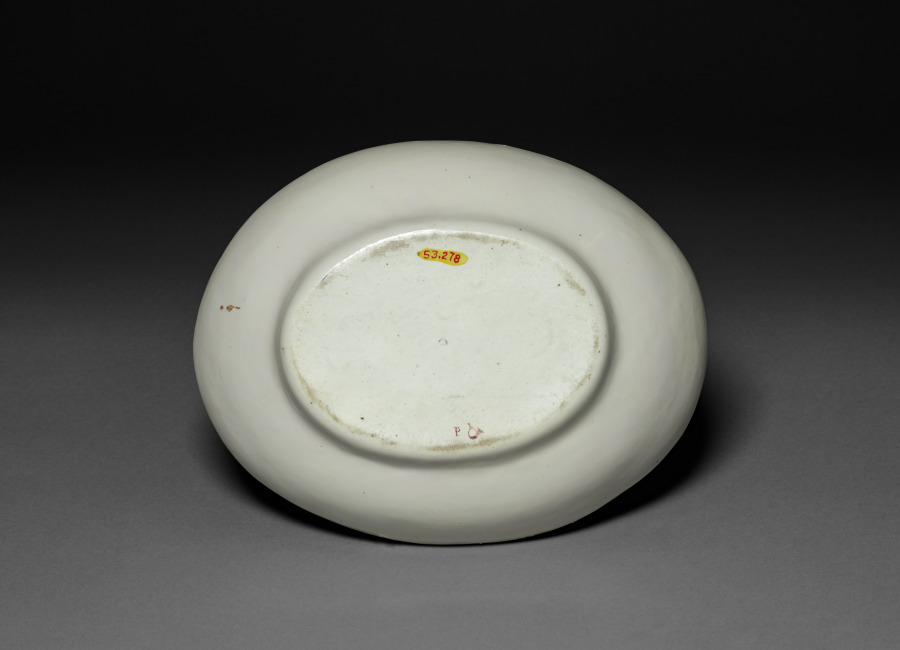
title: Basin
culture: France, Chantilly, 18th century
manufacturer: Chantilly Porcelain Factory (French)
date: c. 1770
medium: soft-paste porcelain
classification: Ceramic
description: On the basis of the style of its decoration, particularly the symbolic trophies of love derived from the repertoire of classic ornament, this ewer and basin can be dated c. 1770. At this period, the output of the Chantilly factory was largely restricted to comparatively utilitarian table wares; pieces such as these are quite rare.